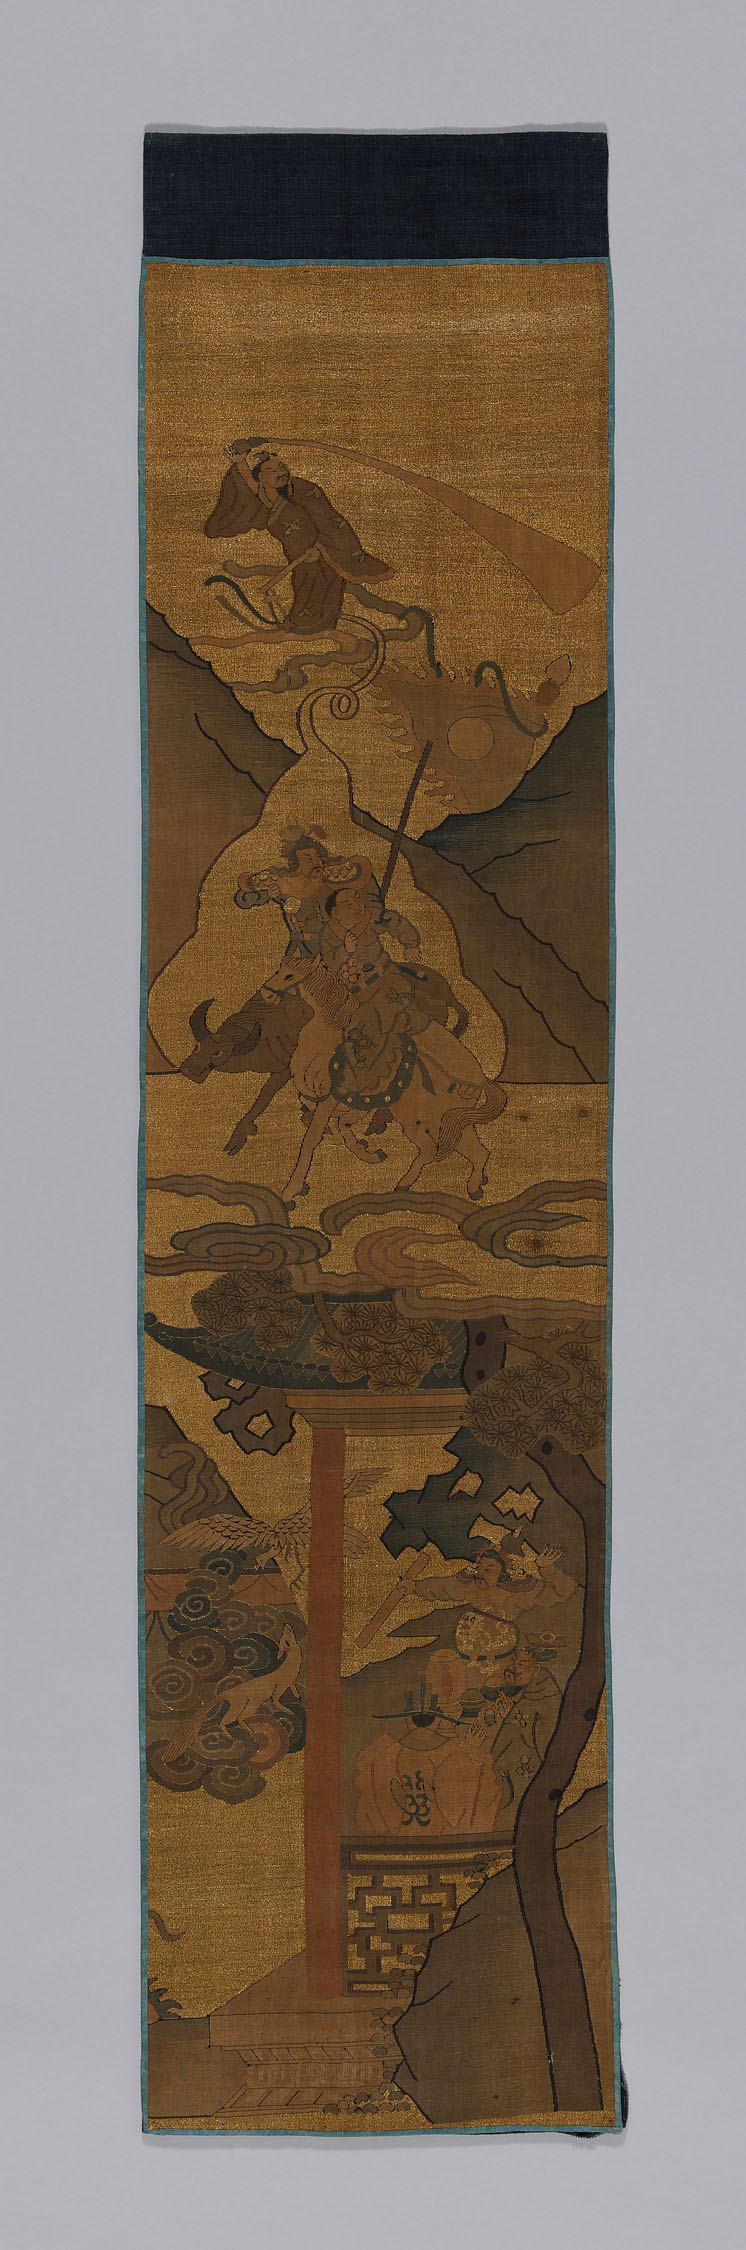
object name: Textile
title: Panel (Furnishing Fabric)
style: qing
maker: China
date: Qing dynasty(1644–1911), 1800/1900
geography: China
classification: weaving - tapestry; weaving; textile; furnishing textile